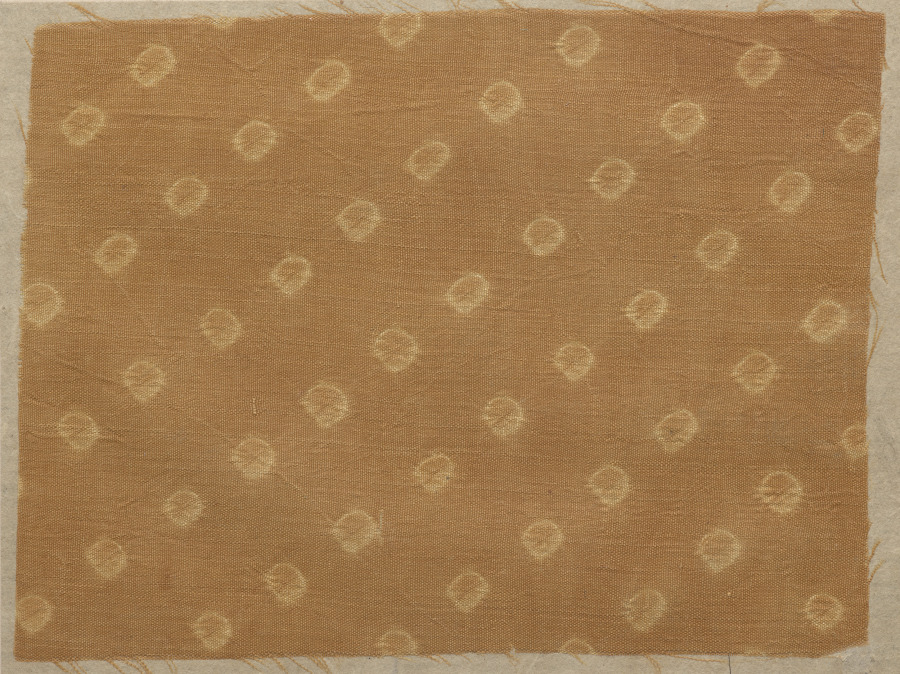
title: Fragment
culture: China or Japan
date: 700s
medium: plain cloth, batik printed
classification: Textile